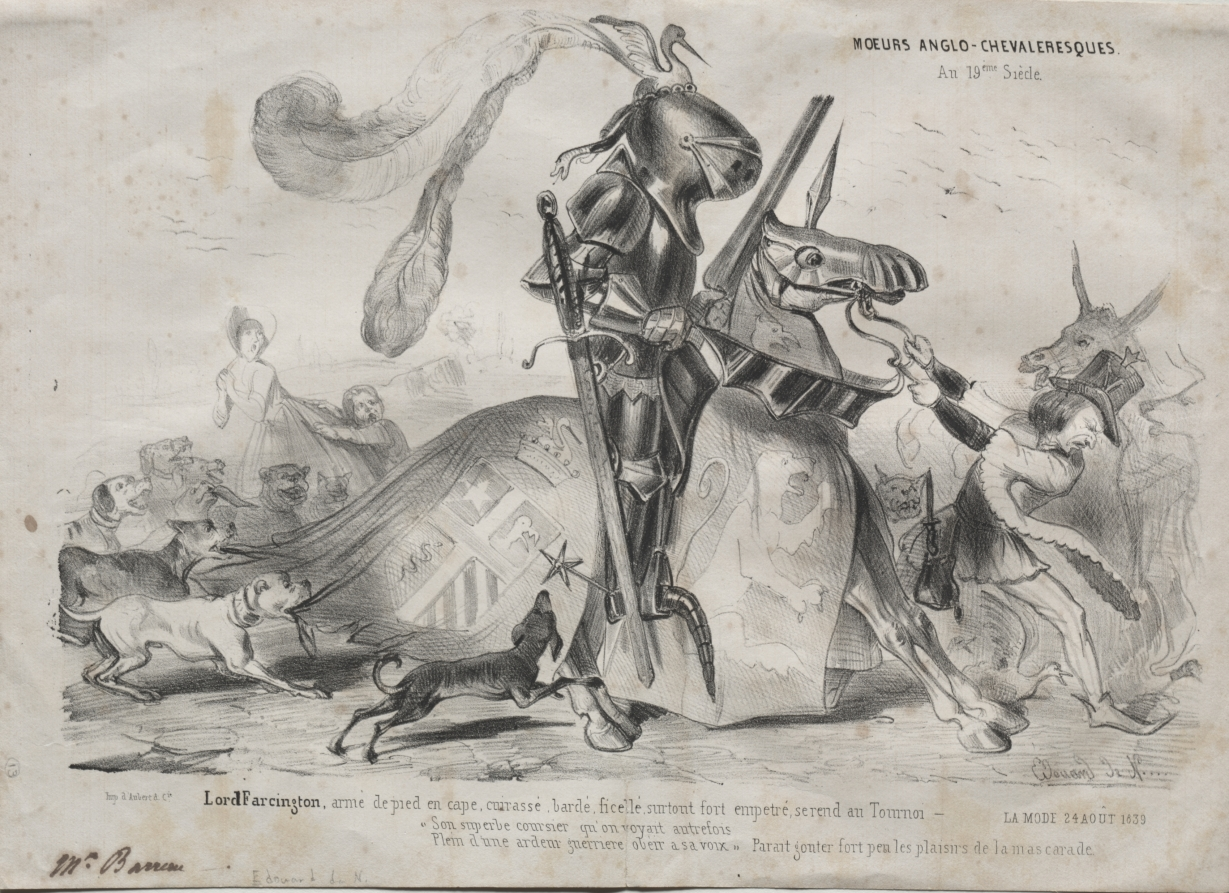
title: Moeurs Anglo-chevaleresques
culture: France, 19th century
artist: Edouard de N___ (French)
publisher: La Mode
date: 1839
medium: lithograph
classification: Print